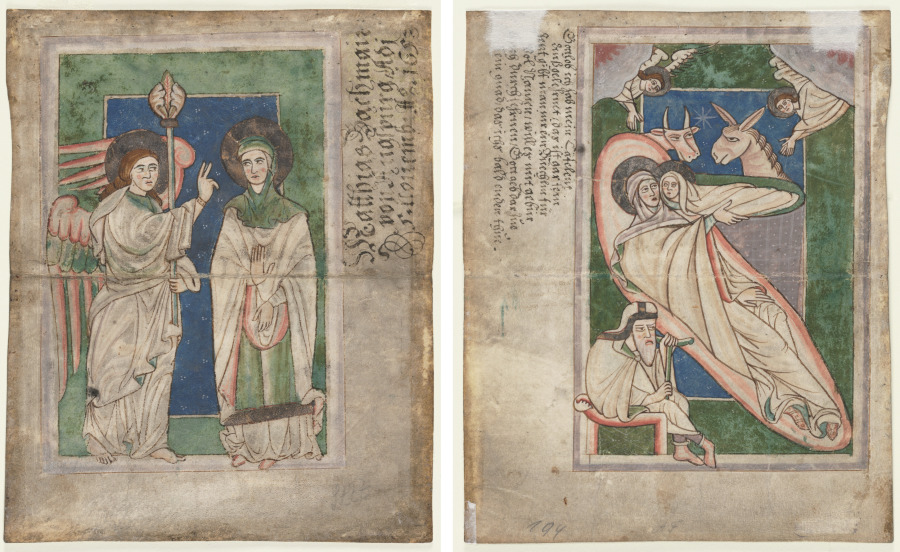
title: Leaf from a Psalter(?): Annunciation (recto); Nativity (verso)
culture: Germany, Bavaria (possibly Prufening or Augsburg), 13th century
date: early 1200s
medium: ink and tempera on parchment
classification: Manuscript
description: Psalters were commonly used in monasteries and convents during the Middle Ages; the exact origin of this detached psalter leaf, however, is unclear. Stylistically it relates to a small number of manuscripts produced at Prüfening Abbey near Regensburg and to other examples associated with scriptoria at Augsburg from the early 1200s. Though its immediate source remains obscure, it is certainly South German.